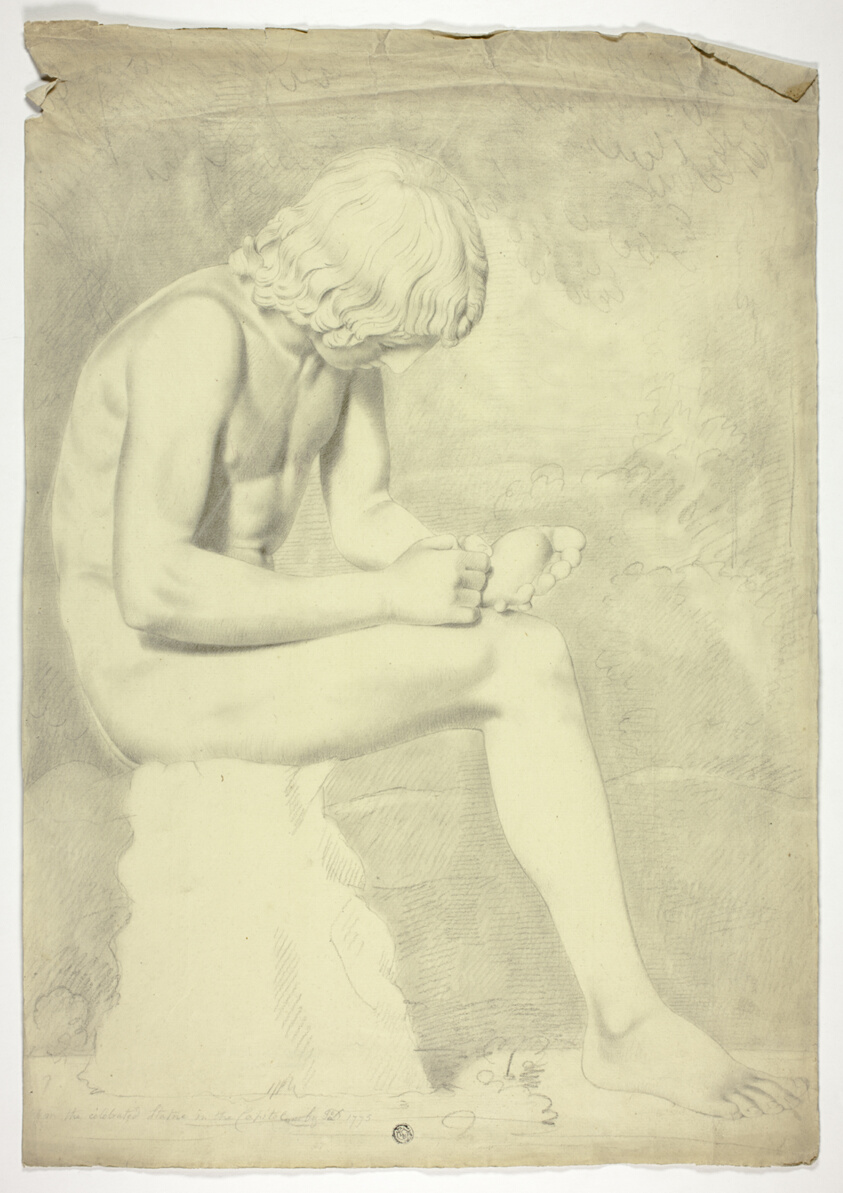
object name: Drawing and Watercolor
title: After the Spinario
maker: John Downman (English, 1750-1824)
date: 1775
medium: Black chalk with stumping on ivory laid paper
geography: England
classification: chalk; paper; drawings (visual works); prints and drawing